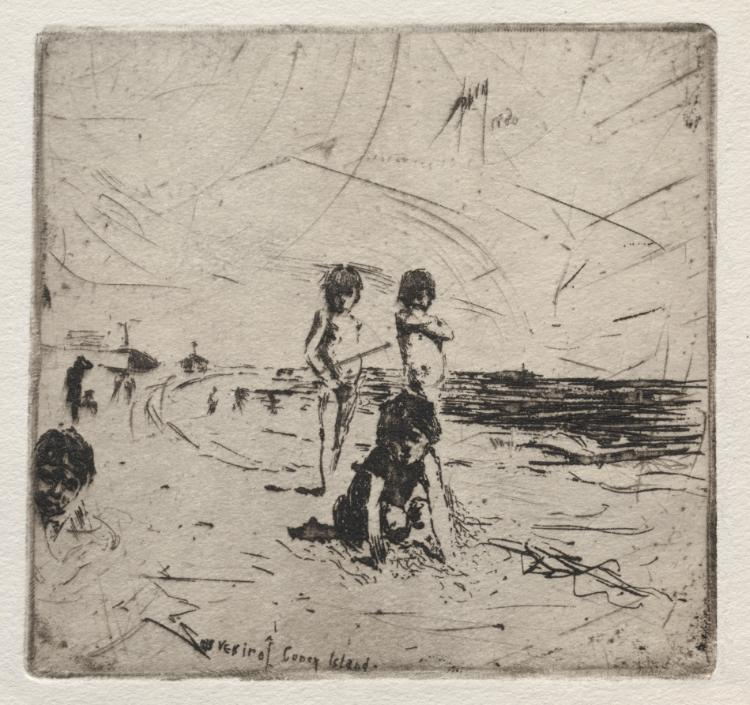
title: Souvenir of Coney Island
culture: America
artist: Robert Frederick Blum (American, 1857–1903)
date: 1880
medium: etching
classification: Print